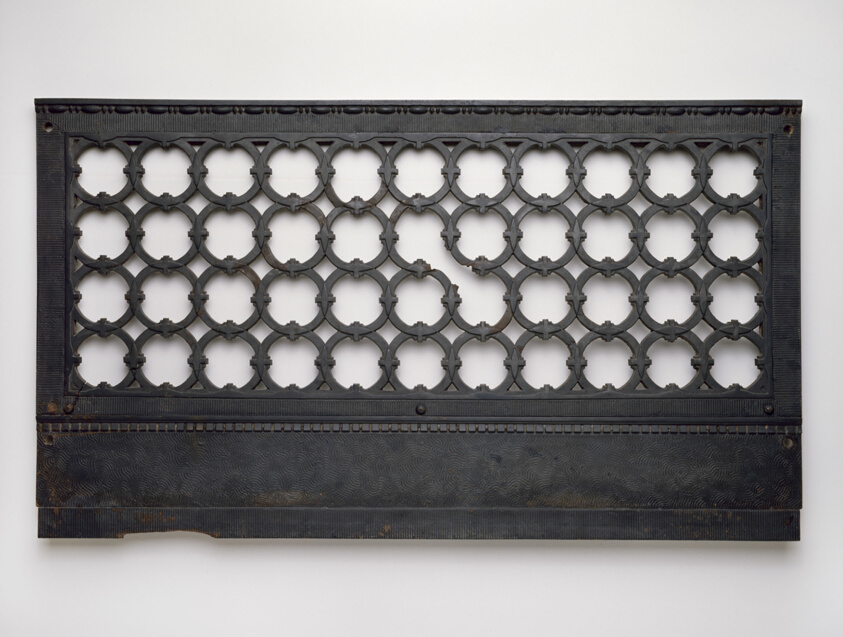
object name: Architectural fragment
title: Marquette Building: Elevator Grille Base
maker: Holabird & Roche, Architects; American, 1883-1927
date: 1893/95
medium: Cast iron with Bower Barff finish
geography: Dearborn Street, 140 South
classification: architectural fragment; architecture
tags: Chicago